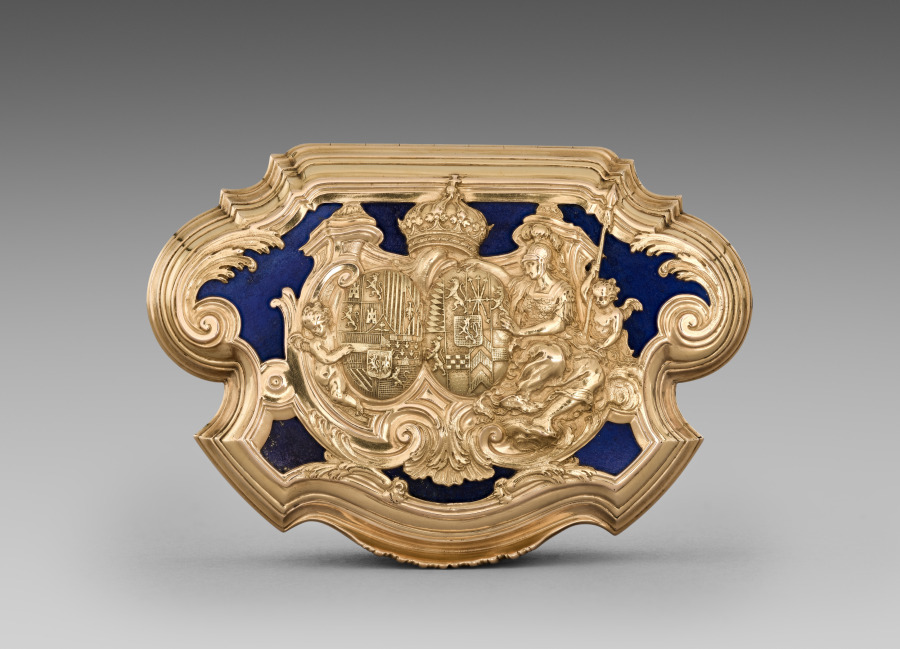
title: Gold Box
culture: France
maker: Juste-Aurèle Meissonnier (French, 1695–1750)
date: 1728–29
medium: gold and lapis lazuli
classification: Metalwork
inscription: IOM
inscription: a crowned M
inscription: a crowned dolphin's head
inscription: a crowned chancellor's mace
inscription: double frame eagle's head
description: With its central cartouche, heavy molding, and fluted sides, the design of this box attests to Juste-Aurèle Meissonnier’s interest in architecture. The box is further distinguished by a strong sense of movement, achieved through its dynamic contour, extraordinary level of detail, and the dramatic contrast between gold and lapis lazuli. Such small boxes, known as snuffboxes, were used to hold scented powdered tobacco that was inhaled through the nostrils. Made of precious materials and highly ornamented, they conveyed the owner’s wealth, fashion awareness, sophistication, and social standing. These personal, collectible items were often presented as luxurious gifts. This box was made for the dowager Queen of Spain, Maria Anna of Neuburg, whose coat of arms – along with that of her late husband, Charles II – features on the cover.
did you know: This is one of the two known objects that bear the maker's mark of Meissonnier.